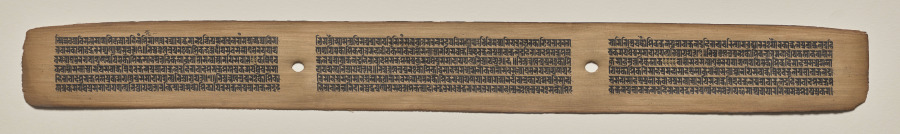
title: Text, Folio 37 (recto), from a Manuscript of the Perfection of Wisdom in Eight Thousand Lines (Ashtasahasrika Prajnaparamita-sutra)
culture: Eastern India, Bihar, Vikramashila Monastery. Painting: Nepal, Kathmandu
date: Sunday, September 14, 1119 (year 239 of the Newar Samvat in the month of Ashvina)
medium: gum tempera and ink on palm leaves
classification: Painting